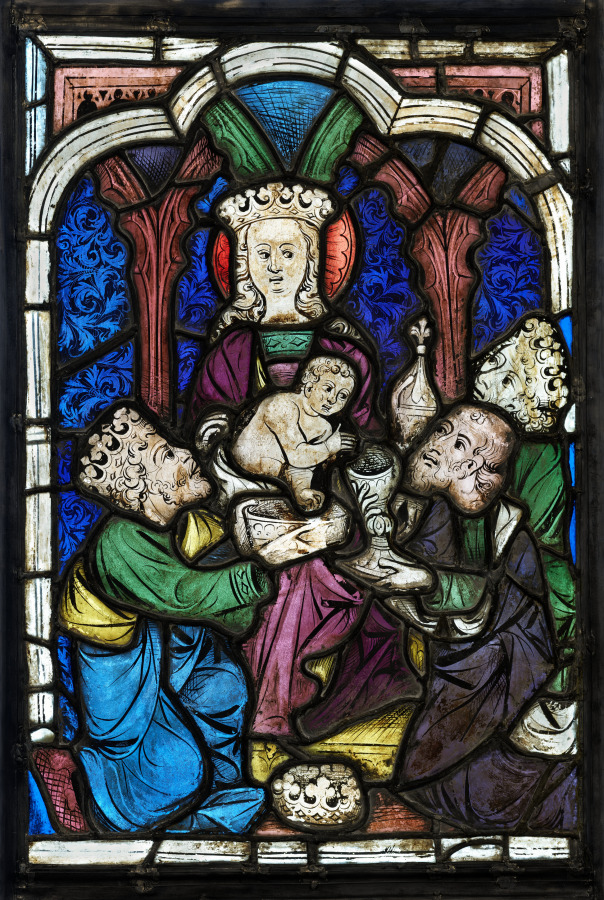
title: The Adoration of the Magi from the Parish Church of Maria am Waasen in Leoben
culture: Austria, Styria, 15th century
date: c. 1410–20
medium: stained glass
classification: Glass